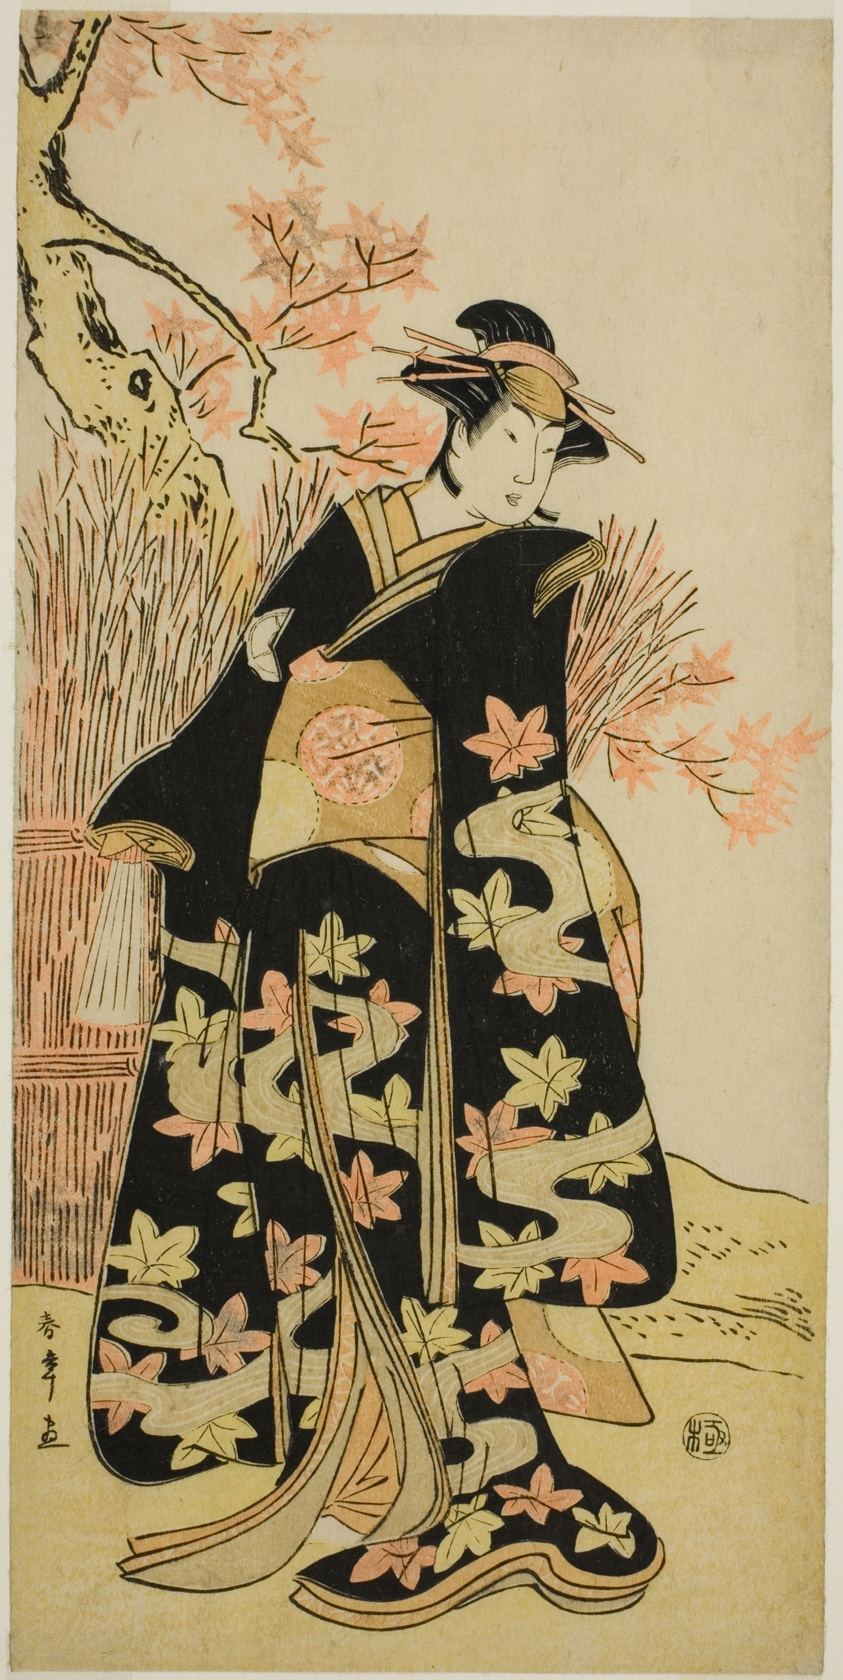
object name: Print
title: The Actor Iwai Hanshiro IV in an Unidentified Role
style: Japanese (culture or style)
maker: Katsukawa Shunsho 勝川 春章; Japanese, 1726-1792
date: c. 1792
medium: Color woodblock print; hosoban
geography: Japan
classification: woodblock print; print; asian art